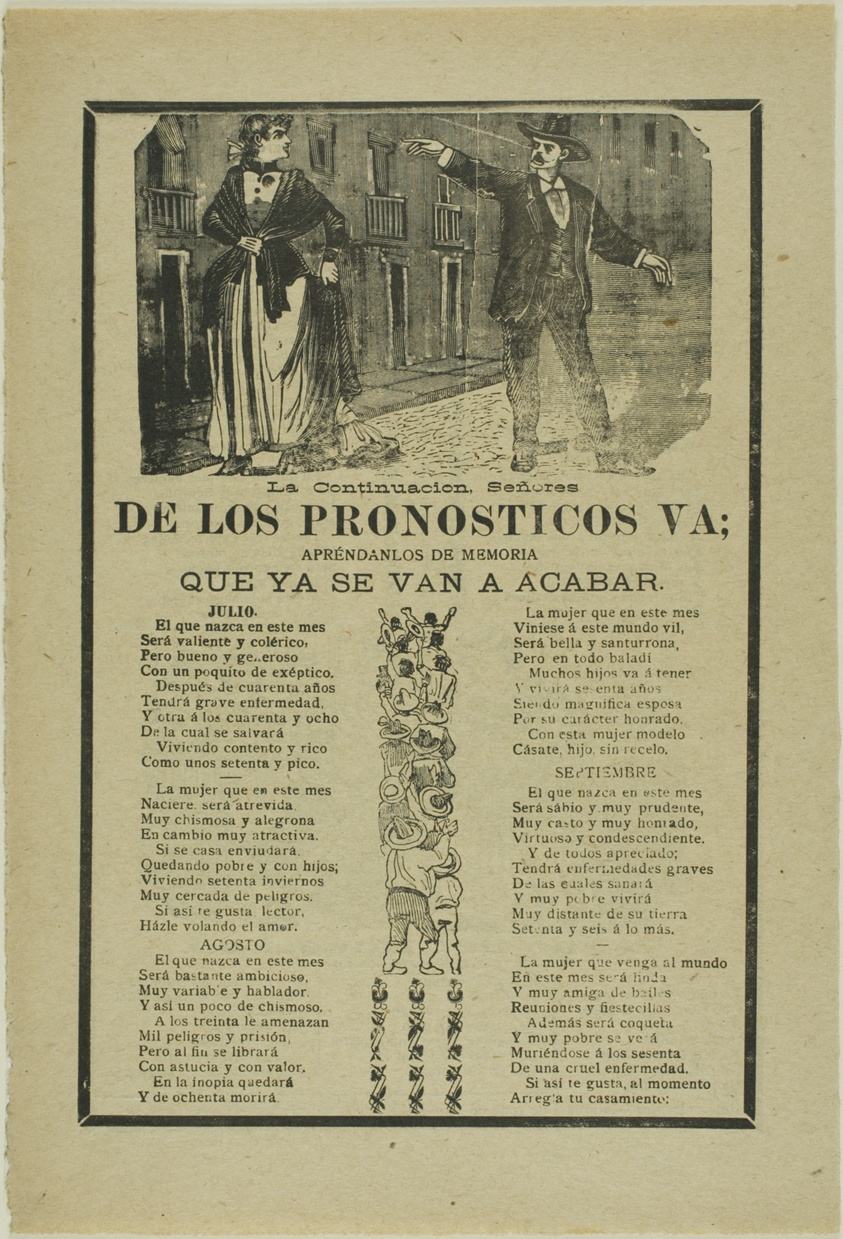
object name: Print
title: The Continuation, Sirs, of the Forecasts...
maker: José Guadalupe Posada (Mexican, 1852-1913)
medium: Double-sided relief engraving on typemetal (recto) and zinc (verso) on paper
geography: Mexico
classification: relief etching; print; prints and drawing